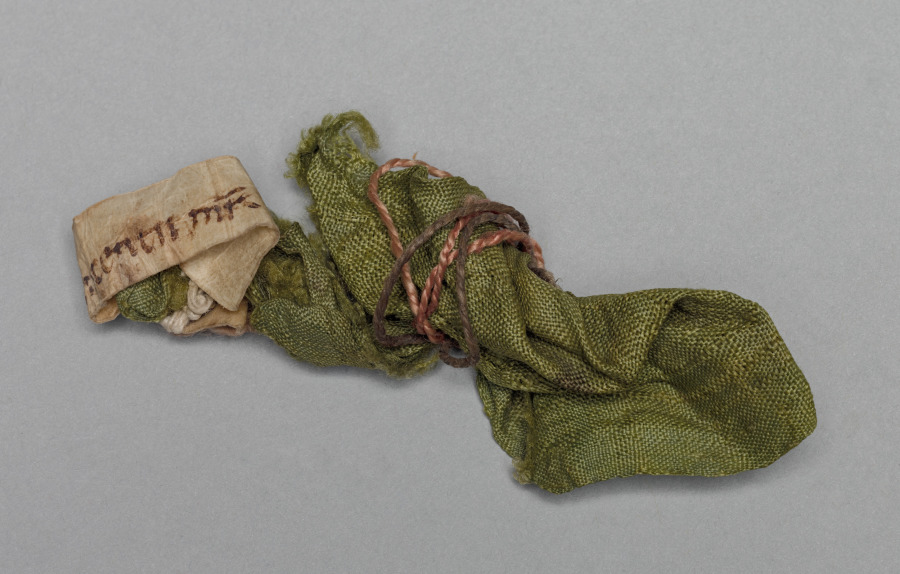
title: Relic of St. Marcian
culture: Germany, Lower Saxony?, Romanesque period, 11th century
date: c. 1045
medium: Plain weave green silk with an extant selvage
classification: Metalwork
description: This relic is in the portable altar that was commissioned by Countess Gertrude of Brunswick, one of the Guelph Treasure’s earliest and most sumptuous objects.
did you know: X-rays revealed no solid material is wrapped in this piece of cloth.